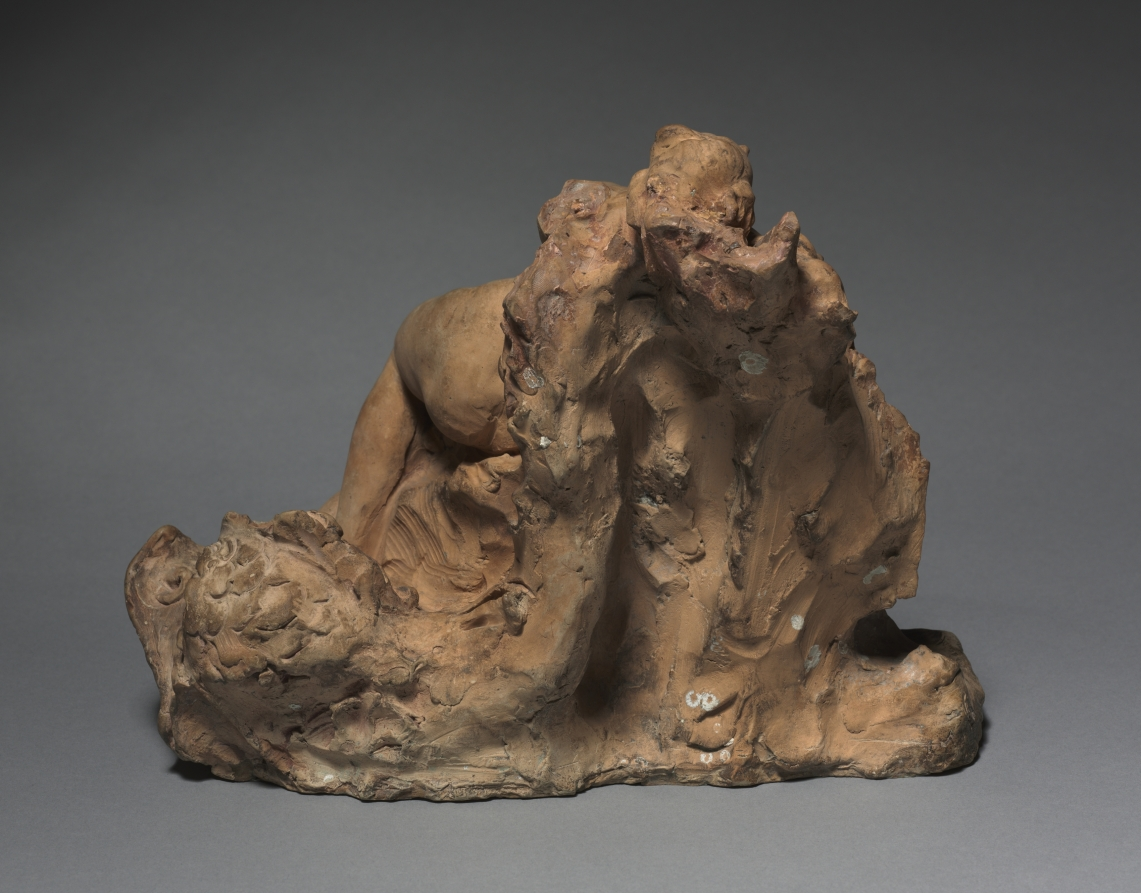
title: Andromeda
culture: Italy, Venice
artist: Antonio Tarsia (Italian, 1663–1739)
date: c. 1720–30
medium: terracotta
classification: Sculpture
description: To stop attacks by a sea monster sent to punish Queen Cassiopeia for bragging that she was more beautiful than the nymphs of the sea, an oracle decreed that her virgin daughter, Andromeda, be tied to a rock and sacrificed to the creature. The hero Perseus would eventually save her, but artists often chose this moment as an opportunity to display a young, nude woman, justified by a veneer of mythology.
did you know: Tarsia sculptred the clay to depict different textures: coral-like rock, smooth skin, and rigid scales.